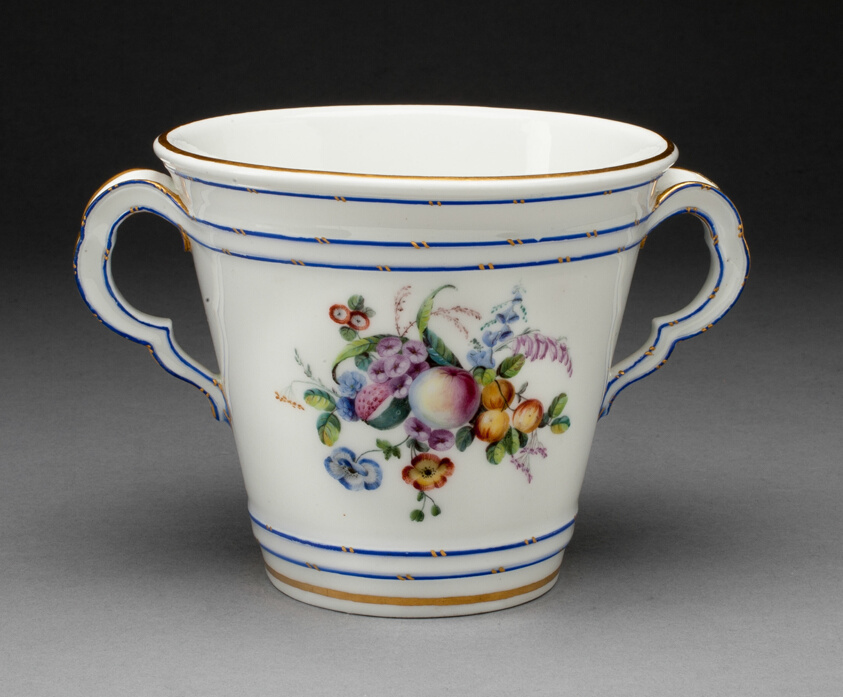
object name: Ceramics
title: Wineglass Cooler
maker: Sèvres Porcelain Manufactory; French, founded 1740; Painted by Pierre-Antoine Méreaud; French, active 1754-91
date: 1758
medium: Soft-paste porcelain, polychrome enamels and gilding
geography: Sèvres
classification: tableware; ceramics; porcelain; european decorative arts